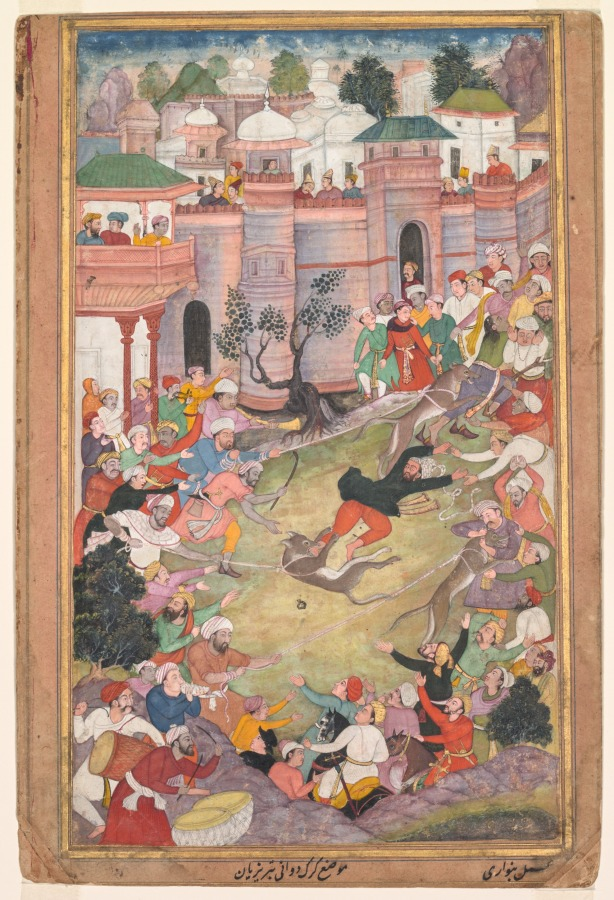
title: The game of wolf-running in Tabriz, from an Akbar-nama (Book of Akbar)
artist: Banavari 1 (Indian, active 1550s-1590s)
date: c. 1595–1600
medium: Gum tempera, ink, and gold on paper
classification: Painting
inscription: signed by Banwari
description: After four years of traveling in exile, fleeing Afghan forces, Humayun reached Tabriz, the glittering capital of the Safavid dynasty in northwestern Iran, here imaginatively rendered by the Indian artist. There the second Mughal emperor enjoyed warm hospitality extended by the shah of Iran, who called for a game of wolf-running for which the city was famous. Artists painting during the time of Akbar, late in his reign when historical subjects dominated, speculated as to how the game was played, based on eyewitness accounts. They gave the figures lively emotive expressions and gestures, and the dense crowding successfully conveys the pandemonium of the scene.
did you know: During extreme activities, turbans could come unwound and fall off.